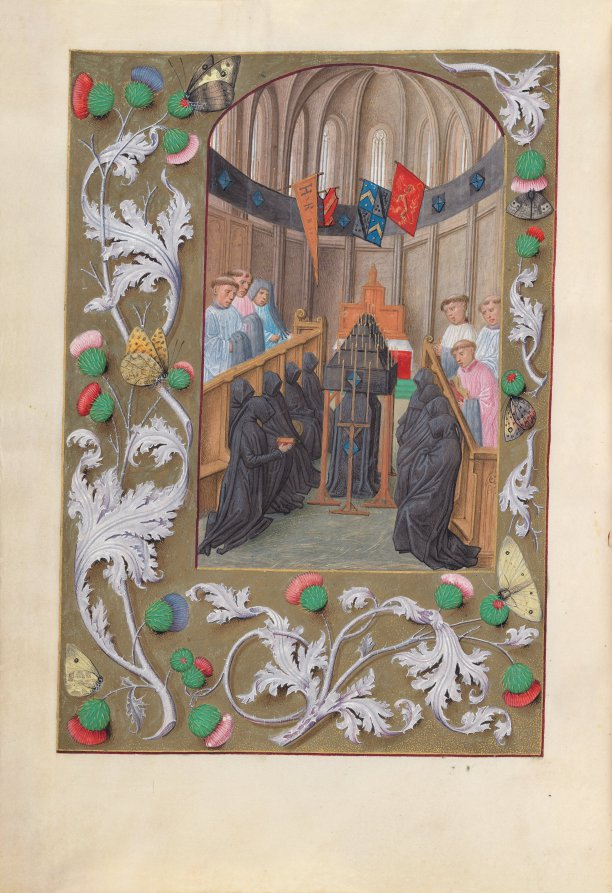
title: Hours of Queen Isabella the Catholic, Queen of Spain: Fol. 219v, Funeral Service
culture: Flanders, Ghent and Bruges, late 15th century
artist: Master of the First Prayerbook of Maximillian (Flemish, c. 1444–1519)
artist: and Associates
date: c. 1500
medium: ink, tempera, and gold on vellum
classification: Bound Volume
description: This manuscript was illuminated by a circle of at least five highly organized manuscript painters active in the Flemish cities of Ghent and Bruges. The principal illuminator was Alexander Bening, who painted the majority of the book's miniatures. Manuscripts produced by this circle of artists are renowned for the decoration of their borders, which typically feature a rich variety of realistically-painted flowers, birds, and butterflies. This prayer book, called a book of hours, was intended not for a cleric, but for the private devotions of a lay person-in this case, Isabella the Catholic, Queen of Spain (1451-1504). Isabella's coat of arms embellishes the book's frontispiece. It is unlikely that the book was commissioned by the Queen herself; rather, she probably received it as a diplomatic gift from someone courting her patronage, perhaps Cardinal Francisco Jimenez de Cisneros. A Franciscan friar, Jimenez was dependent upon Isabella for his advancement, first to the post of Queen's confessor in 1492, and then to Archbishop of Toledo in 1495.